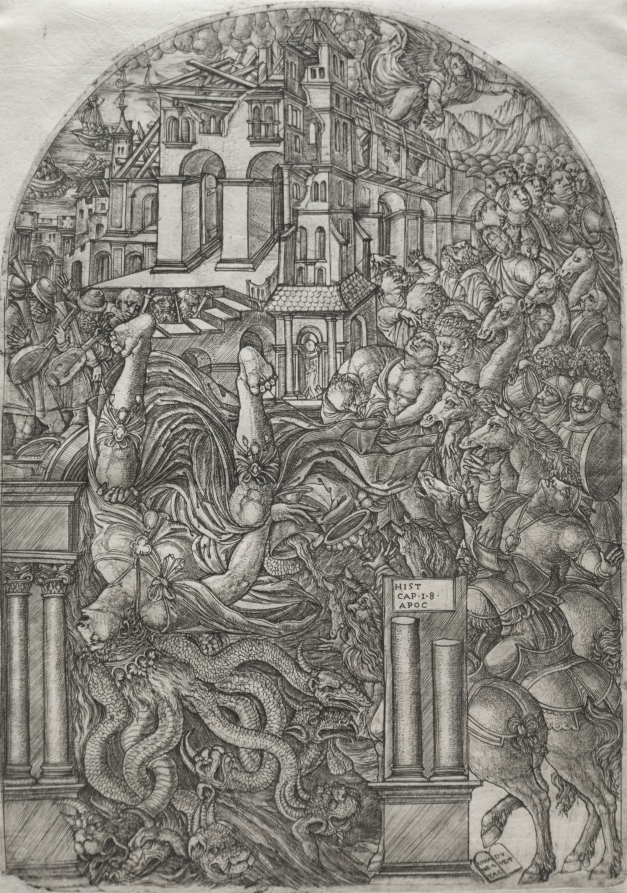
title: The Fall of Babylon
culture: France, 16th century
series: The Apocalypse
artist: Jean Duvet (French, 1485–1561)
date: c. 1555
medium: engraving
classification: Print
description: In addition to the rare bound volume, the museum owns individual impressions of prints from The Apocalypse.